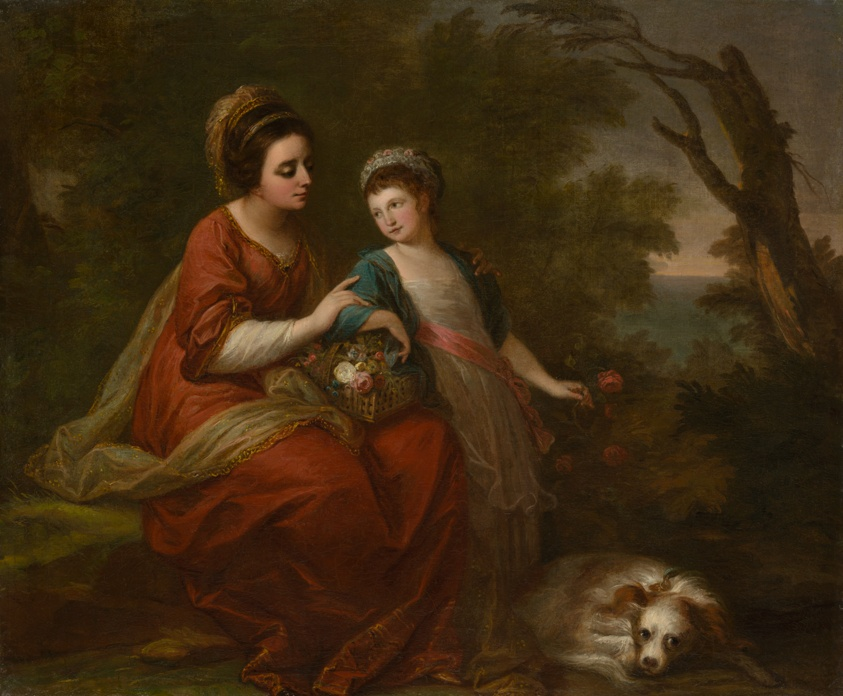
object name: Painting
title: Mrs. Hugh Morgan and Her Daughter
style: 18th Century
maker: Angelica Kauffmann (Swiss, 1741–1807)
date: c. 1771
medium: Oil on canvas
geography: Switzerland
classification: oil on canvas; oil paintings (visual works); paint; painting; european painting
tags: mother and child, luxury, wealth, red (color), trees, landscape, basket, flowers, animals, dog, daughters, mother, girl, children, woman, woman with children, families